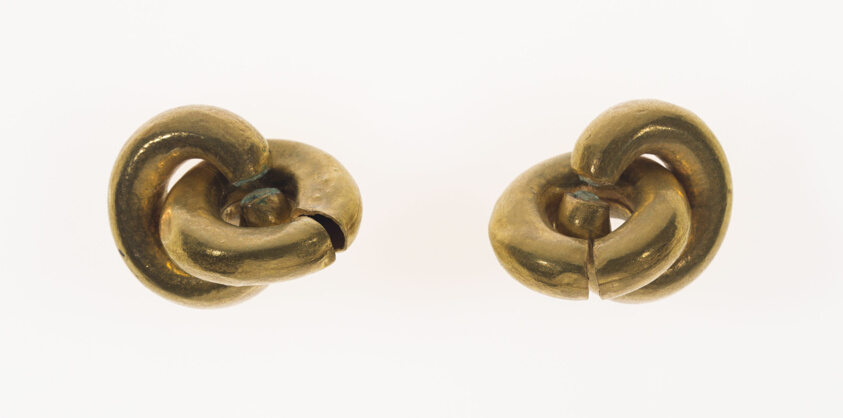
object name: Costume and Accessories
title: Loops for earrings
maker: Korea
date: Three Kingdoms period (57 B.C.-A.D. 676)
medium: Gold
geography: North Korea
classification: jewelry; costume